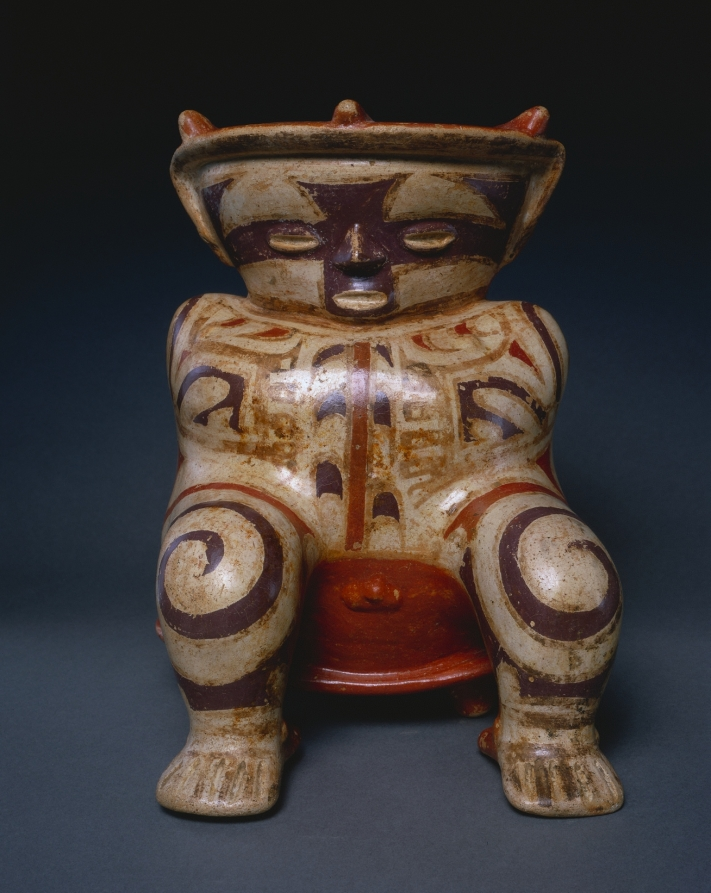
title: Hunchback Seated on a Stool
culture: Central Panama, Conte Style, c. 600-800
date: c. 600–800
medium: earthenware with colored slips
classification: Ceramic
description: The meanings of hunchbacks is not well-studied in Panamanian art. But to the north, in Mexico and Guatemala, such physical anomalies marked individuals of great spiritual power. A few of this figure’s features suggest that hunchbacks held similar status in Panama: The figure sits upon a four-legged stool, a symbol of authority, and the mythic creatures painted on each side may connect the figure to the supernatural realm.